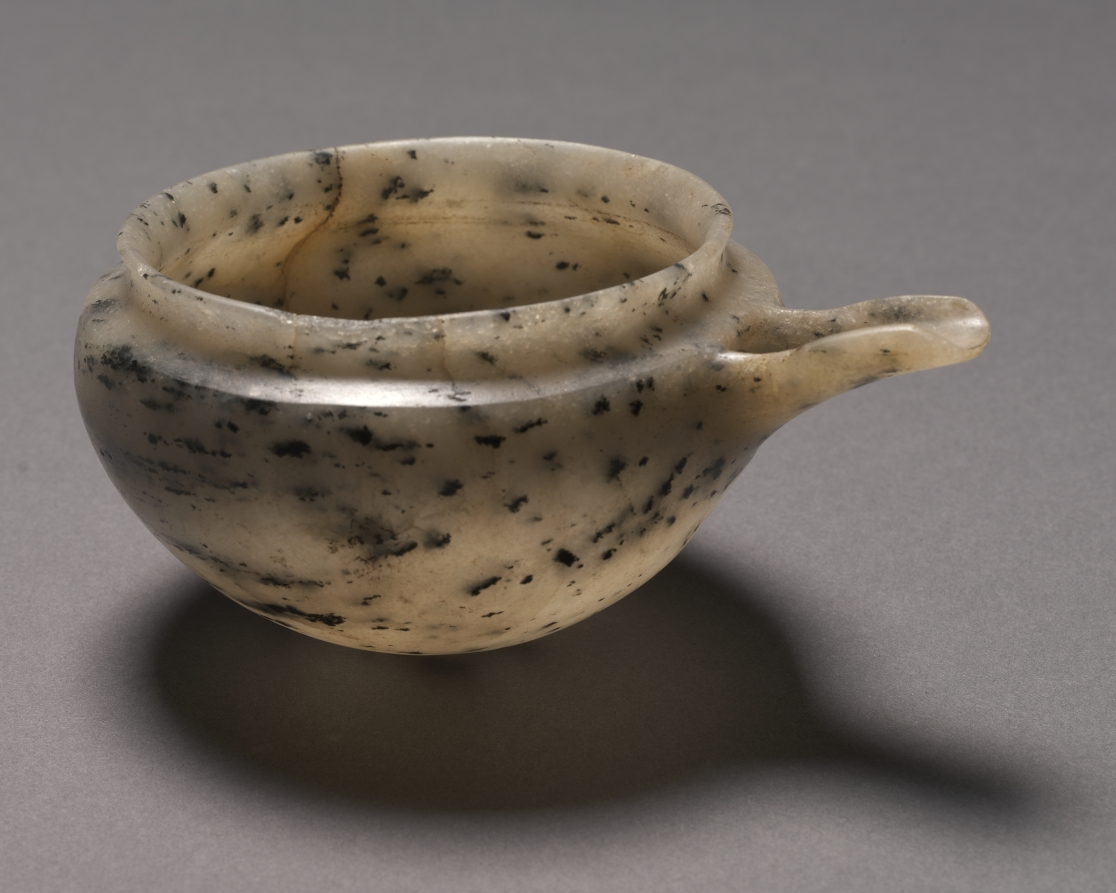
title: Spouted Bowl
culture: Egypt, Old Kingdom (2647–2124 BCE), Dynasty 4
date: c. 2573–2454 BCE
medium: anorthosite gneiss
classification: Vessels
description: Both ancient Egyptian men and women loved cosmetics. Unguents, oils, and perfumes made from aromatic plant resins and gums were obtained at great cost from distant lands. The objects identified with cosmetics were given lavish treatment. The luxurious obsidian and gold beaker hints at the precious contents it once held. Others are fanciful in form, such as an ostrich egg. The god Bes, patron god of cosmetics, himself is the subject of a colorful jar. The delicately carved human face and the head of a giraffe decorated elaborate ivory cosmetic spoons.